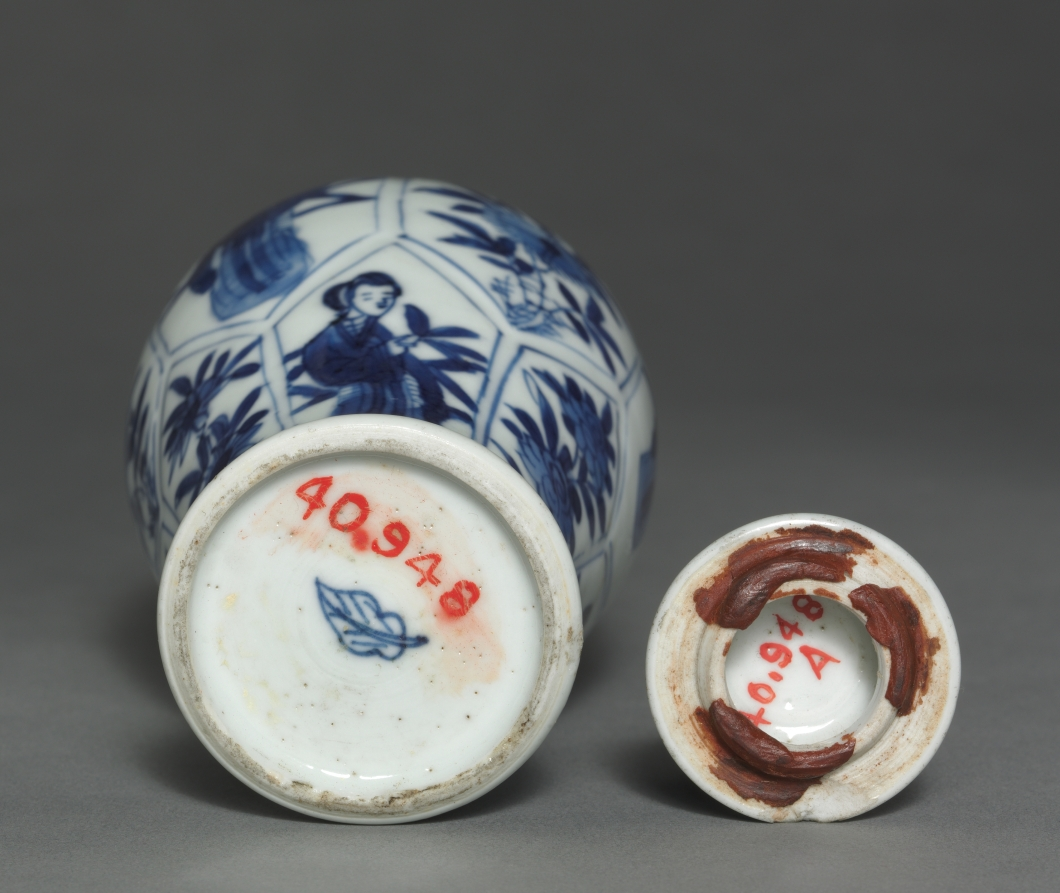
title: Jar with Cover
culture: China, Qing dynasty (1644-1911)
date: 19th Century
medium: porcelain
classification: Ceramic